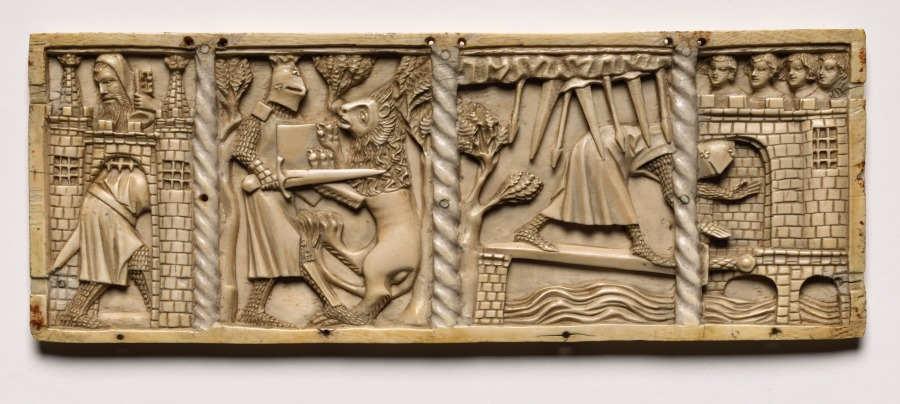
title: Panel from a Casket with Scenes from Courtly Romances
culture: France, Lorraine?, Gothic period, 14th century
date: 1330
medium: ivory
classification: Ivory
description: Among the most lavish and deluxe products of French ivory workshops of the 1300s were large caskets carved with elaborate scenes drawn from courtly romances. This panel shown here comes from such a casket. This side panel depicts scenes such as Sir Gawain and the Lion and Lancelot crossing the sword bridge. These images suggesting chivalry, fertility, virginity, youth, and an idealized courtly love likely derive from manuscripts including the Roman de la Rose and the poems of Chrétien de Troyes. Such texts were often found within the libraries of the aristocracy, so the casket’s symbolic images would have been readily understood. Such caskets may have originally been gifts between a man and a woman. The expense of the material, ivory, suggests they were produced for an elite clientele.